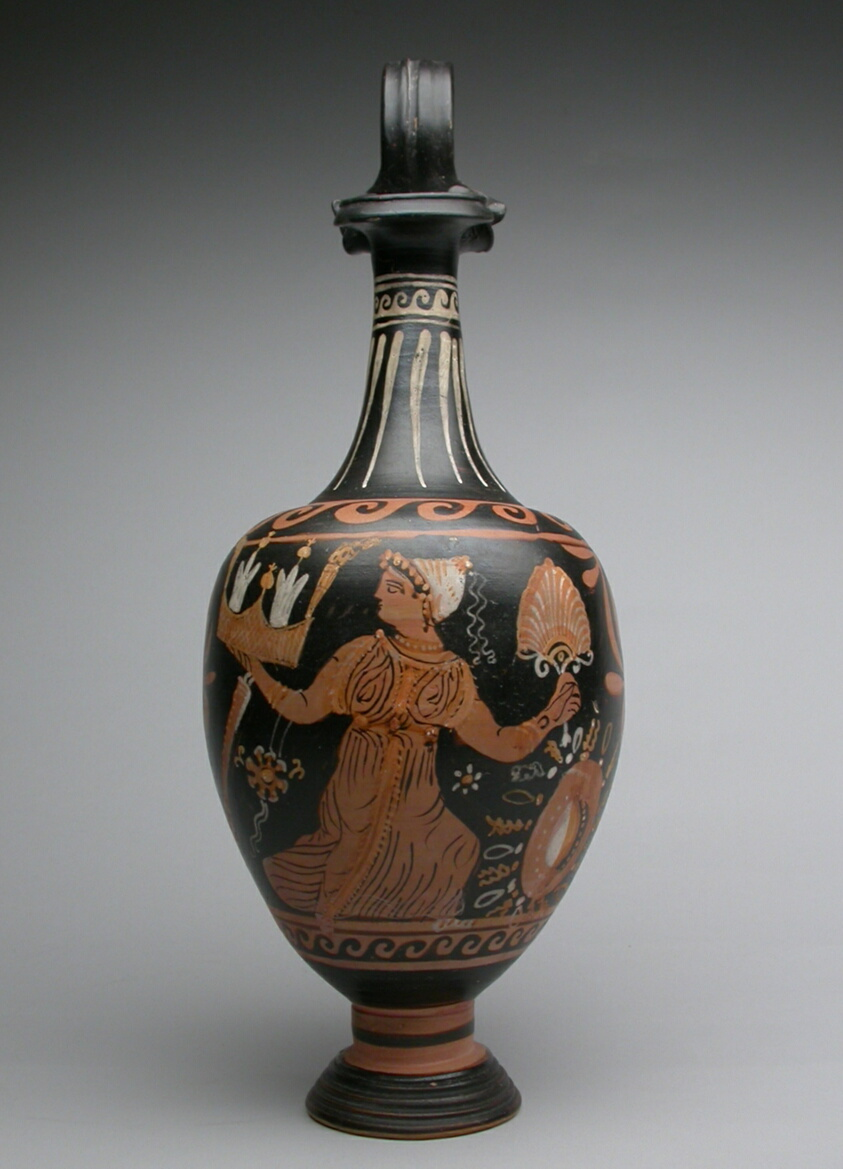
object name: Vessel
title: Oinochoe (Pitcher)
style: red-figure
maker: Attributed to the Mattinata Painter; Greek; Apulia, Italy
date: end of 4th century BCE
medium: terracotta, red-figure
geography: Greece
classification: pitcher (vessel); ceramics; vessel; ancient art